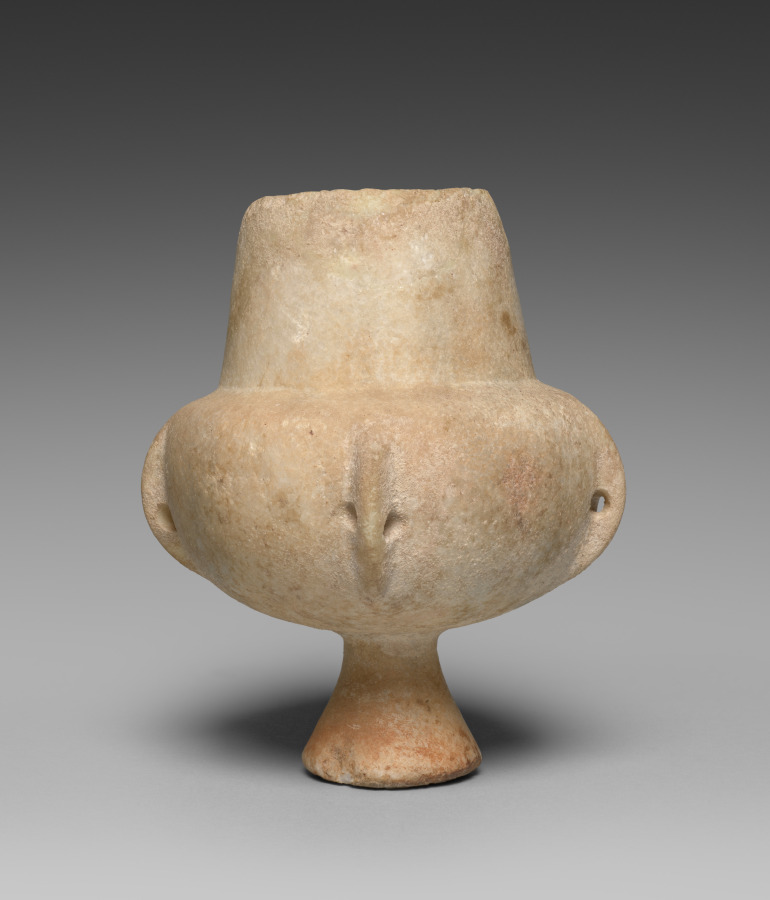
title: Kandila (Collared Jar with Conical Foot)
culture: Greece, Cycladic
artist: Master A (Greek)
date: 3000–2950 BCE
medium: marble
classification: Sculpture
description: Kandila, the modern Greek word used by archaeologists for Early Cycladic stone jars like this one, also refers to a type of hanging oil lamp, similar in shape but made of metal and still used in some Greek Orthodox churches. Despite this name and the formal similarity, the primary function of the prehistoric kandila remains uncertain. The holes drilled through each of its four lugs may have been used for hanging or to secure a lid.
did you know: "Cycladic" refers to a group of Aegean islands where vessels like this were made.